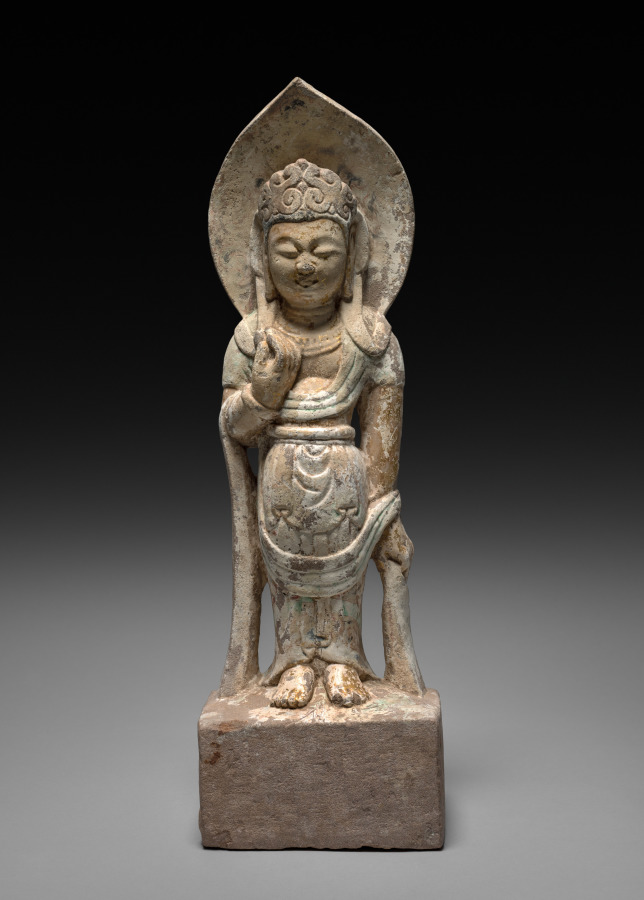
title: Bodhisattva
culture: China, Sui dynasty (581-618) - Tang dynasty (618-907)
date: late 500s–early 600s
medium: stone with polychromy and gilding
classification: Sculpture